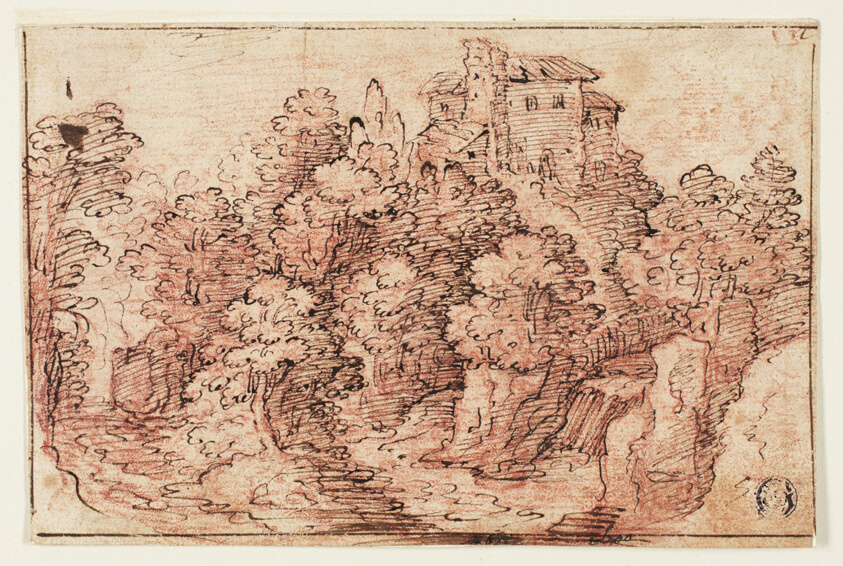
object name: Drawing and Watercolor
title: Landscape: House on Wooded Hill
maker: Unknown Artist; German, n.d.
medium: Pen and brown ink over red chalk, on buff laid paper, partially laid down on buff laid paper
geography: Germany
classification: pen and ink drawings; drawings (visual works); prints and drawing